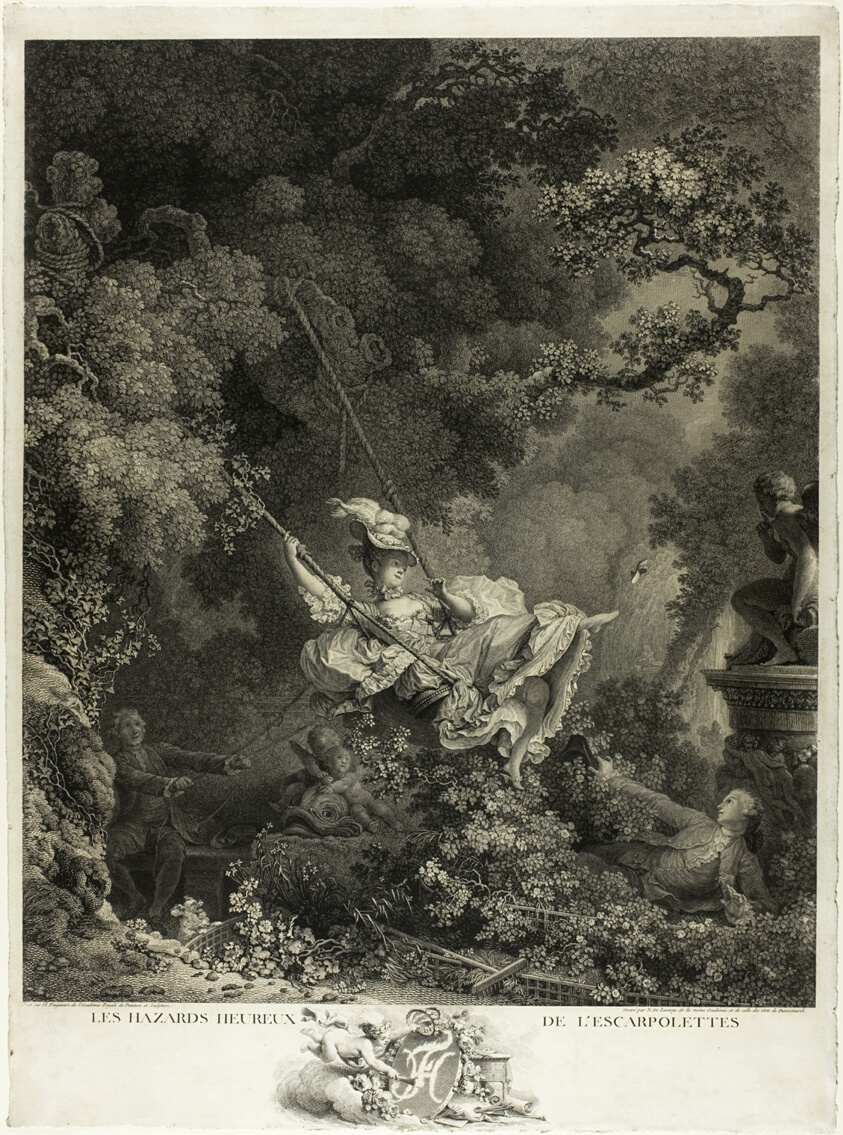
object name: Print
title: The Happy Accident of the Swing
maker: Nicolas Delaunay (French, 1739-1792); after Jean-Honoré Fragonard (French, 1732-1806)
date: 1792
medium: Engraving in black ink on ivory laid paper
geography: France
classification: engraving; print; prints and drawing